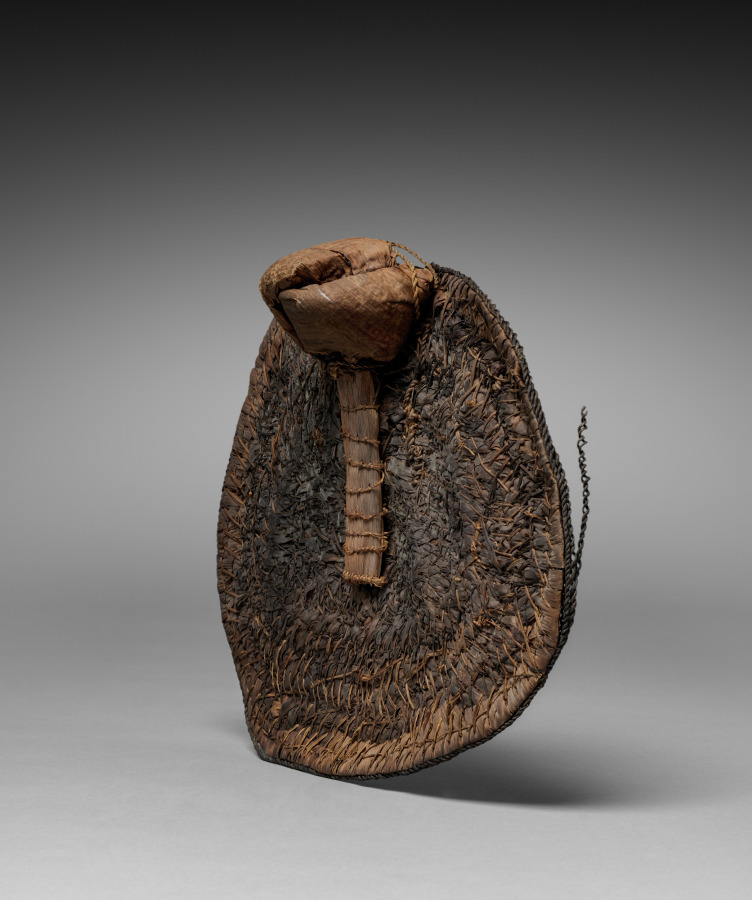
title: Back Skirt / Sitting Pad (negbe)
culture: Africa, Central Africa, Democratic Republic of the Congo, Mangbetu-style maker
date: before 1929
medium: Plant fibers and dye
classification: Garment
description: Egbe (singular: negbe) were fashionable and practical garments aristocratic Mangbetu women made for special occasions. Worn over a skirt, it tied onto a girdle along with a frontal “apron.” The curved interior piece rested on the lower back. Thickly woven, flexible natural fibers bent with the body, cushioning the wearer’s behind when sitting. When the woman was standing, the decorated flat portion faced outward, showing off bold geometric motifs. Egbe were among items sold to foreigners at the Mangbetu king’s encouragement as the Mangbetu actively constructed their self-image for outsiders during the 1920s and 1930s.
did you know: A contemporary fashion in 1929, when it was purchased or collected, this negbe is now a historical document of past styles.